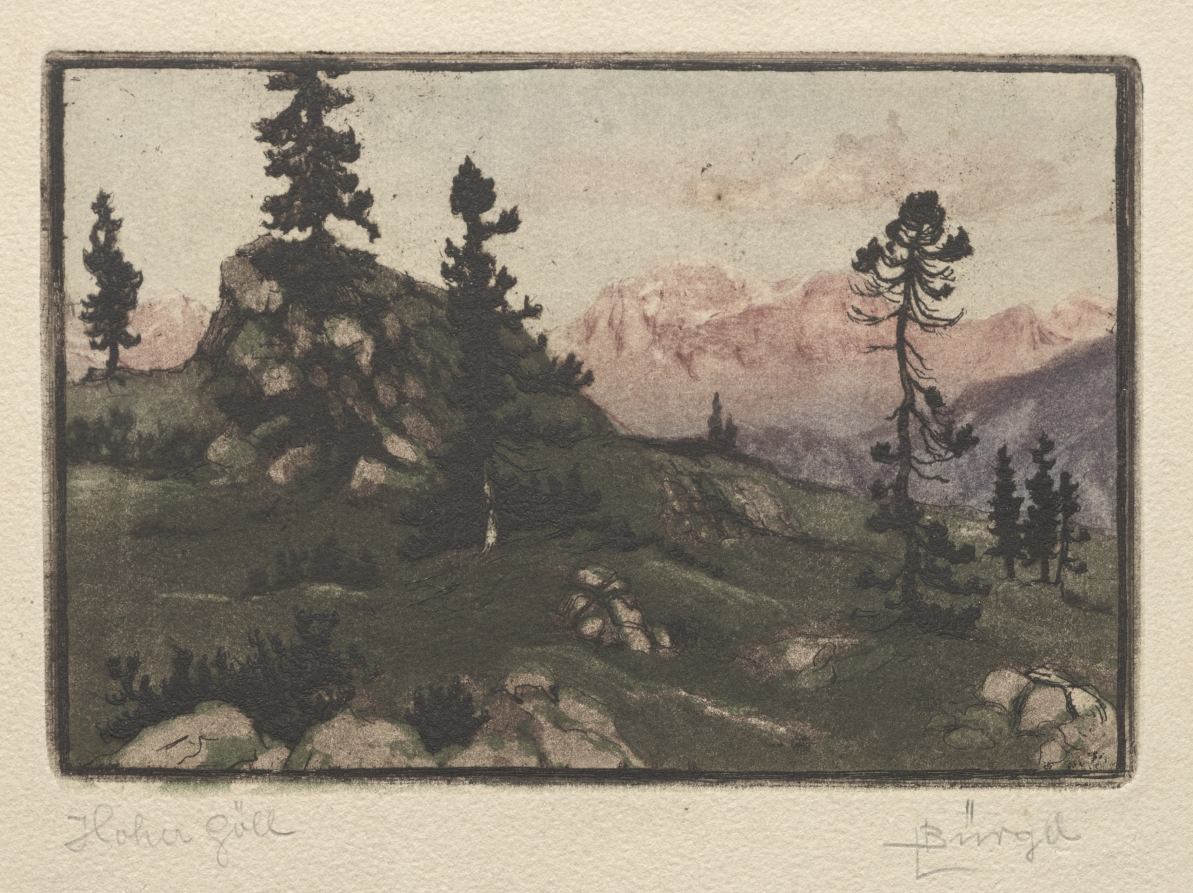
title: Hoher Gull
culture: Germany, 19th century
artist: Hugo Burghel (German, 1853–1903)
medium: color aquatint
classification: Print